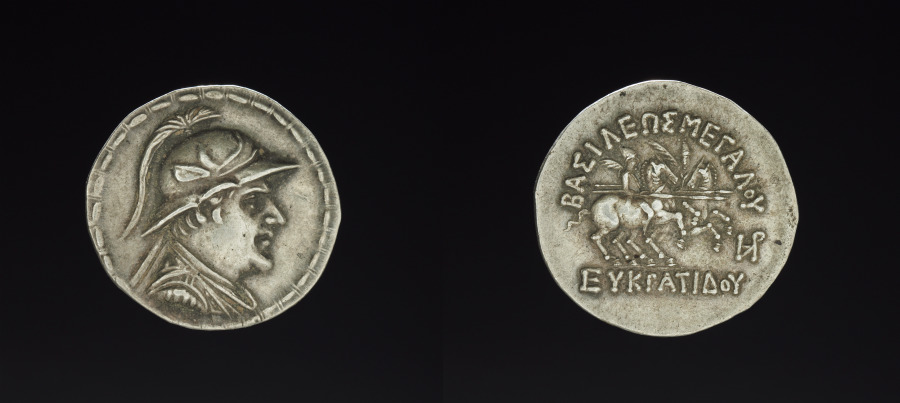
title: Coin of Eukratides I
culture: Afghanistan, Bactria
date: 170–145 BCE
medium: silver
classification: Silver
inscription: BASILEOS MEGALOU EUKRATIDOU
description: Eukratides, a successor of Alexander in Bactria, wears a helmet with bull's ear and horn, like military leaders from Macedon, Alexander's homeland in the north of Greece. On the reverse Castor and Pollux, sons of Zeus, ride horseback. Because Alexander also was considered to be an offspring of Zeus, Eukratides referenced his link to Alexander by including Castor and Pollux on his coin.